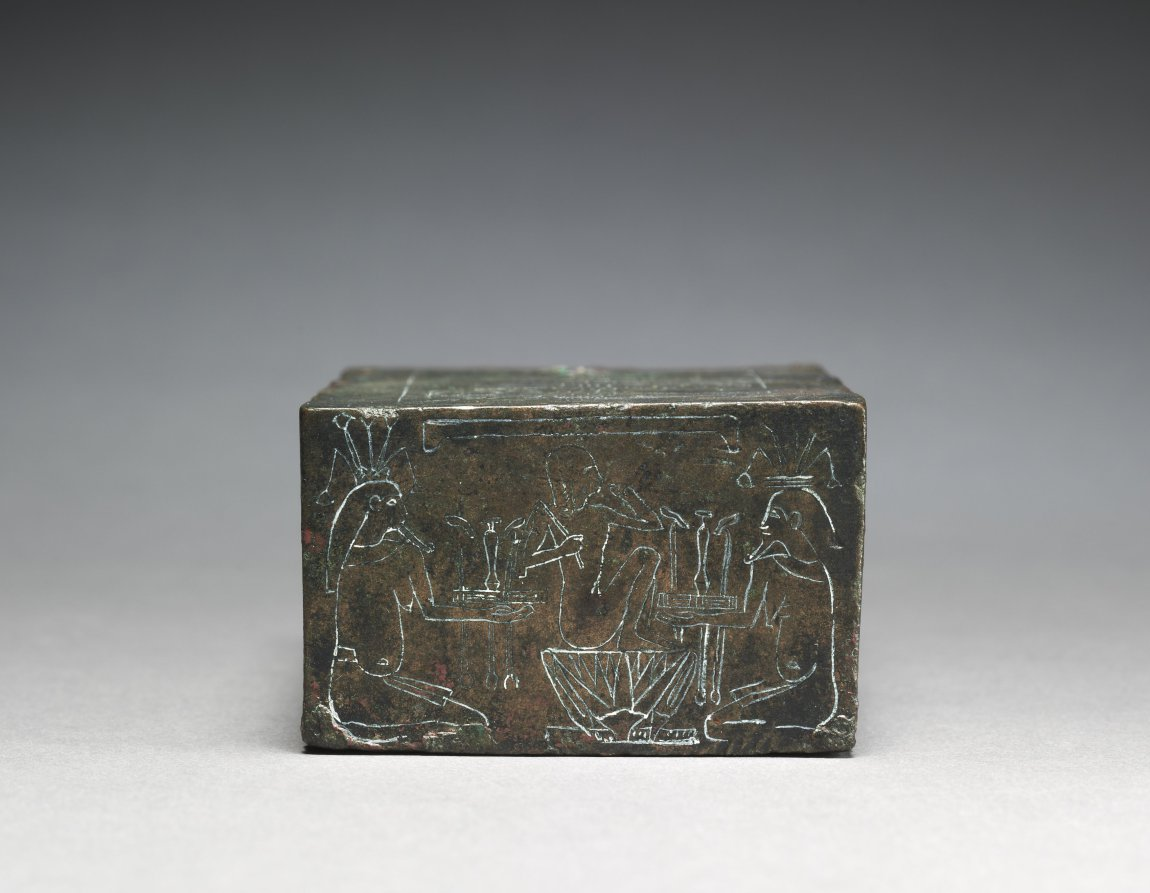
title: Statue Base Dedicated to Amen-Ra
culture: Egypt, Late period (715–332 BCE), Dynasty 26 or later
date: 664–525 BCE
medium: bronze, hollow cast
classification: Sculpture